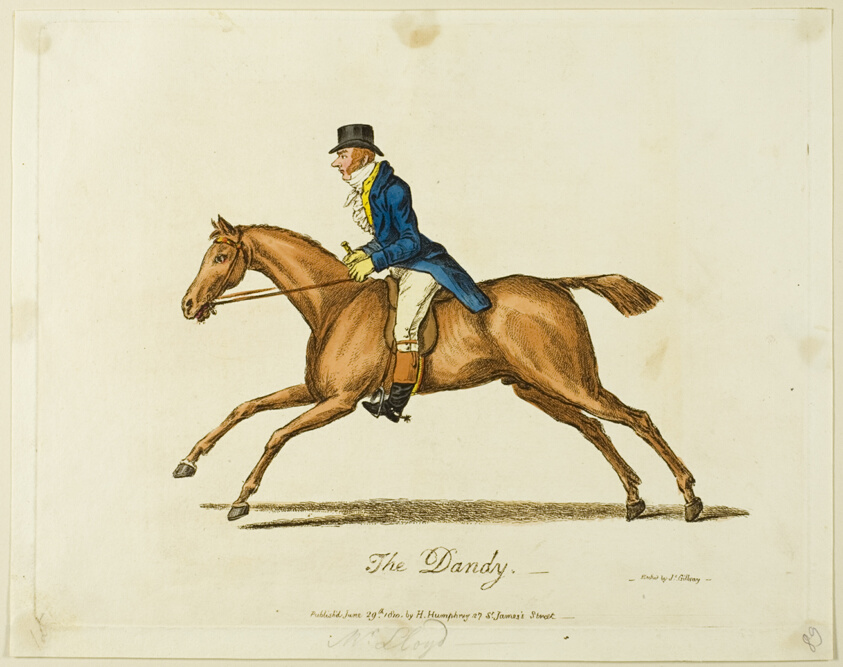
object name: Print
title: The Dandy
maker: James Gillray (English, 1756-1815); published by Hannah Humphrey (English, c. 1745-1818)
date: published June 29, 1810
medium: Hand-colored etching on paper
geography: England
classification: etching; print; prints and drawing